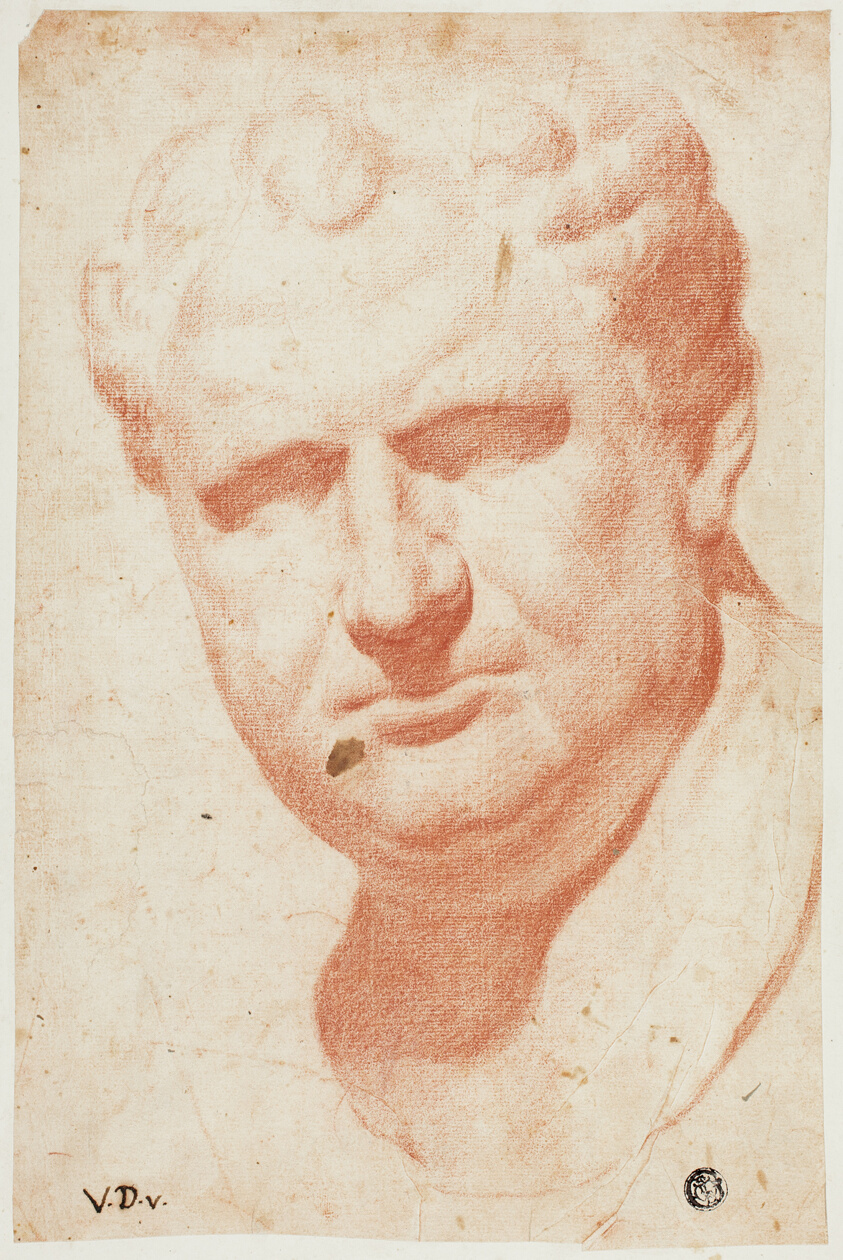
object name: Drawing and Watercolor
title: Ancient Portrait Bust of Vespasian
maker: Vincenzo Dandini (Italian, 1607-1675)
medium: Red chalk on buff laid paper, laid down on ivory wove card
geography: Italy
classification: chalk; drawings (visual works); prints and drawing